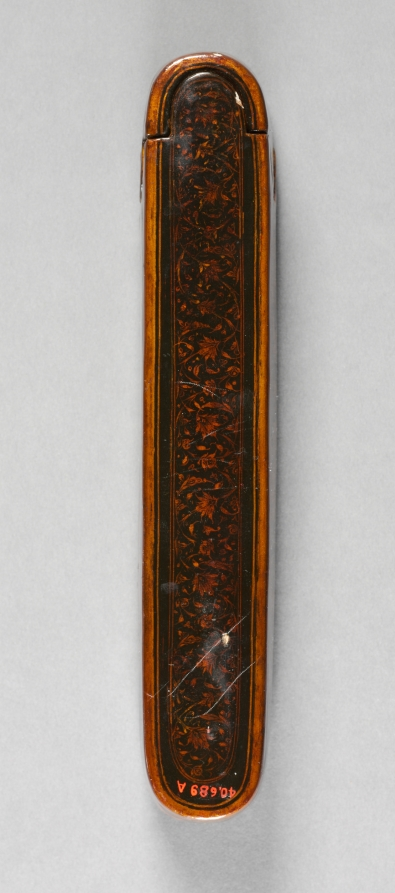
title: Pen and Ink Box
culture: Iran, probably Isfahan, Safavid period (1501–1722)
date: 1667–98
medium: Varnished lacquer and opaque watercolor over papier-mâché, ink, and copper alloy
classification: Lacquer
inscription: 1109